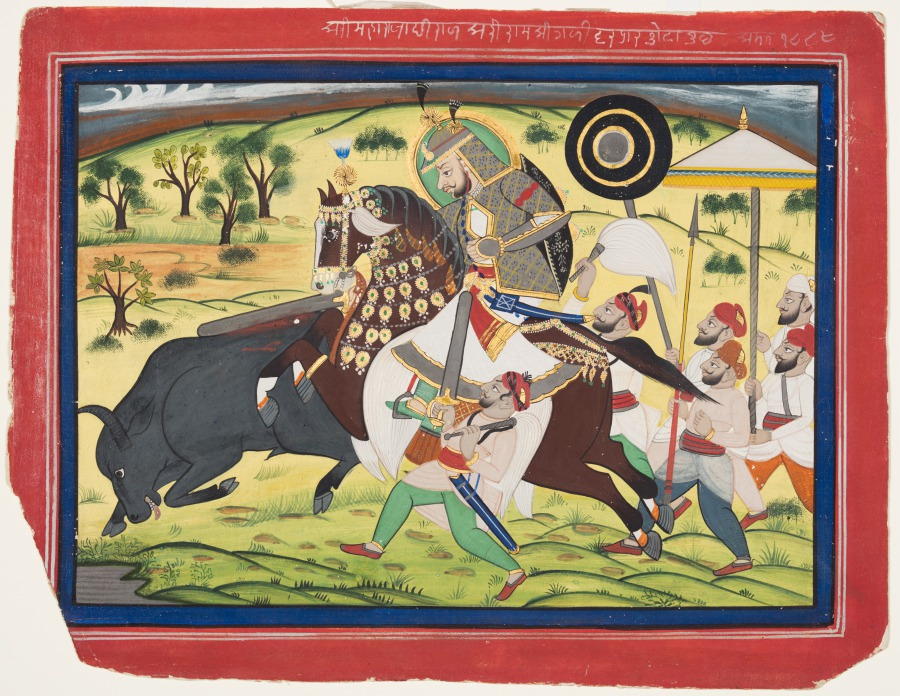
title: Maharao Ram Singh II of Kota (r. 1828–66) Hunting Buffalo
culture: Northwestern India, Rajasthan, Rajput Kingdom of Kota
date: 1832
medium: gum tempera, gold and silver on paper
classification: Painting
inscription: srī mahārājādhīrāja sarī rāma sīga jī darabāra kotā ko samata 1889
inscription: catero pīlancīthī (pīka ne līkhī) chabī darabāra sarī rāma sīga jī rī cha samata 1889 posa badi 5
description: In an energized hunting scene, the equestrian Maharaja Ram Singh smites a running buffalo with his sword. The Maharaja is supported by a hunting party, who carry various objects for the Rajput king’s vanity, including additional swords, a fly whisk, a parasol, and a canopy.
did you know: The Raja is heavily armoured for a buffalo hunt, perhaps symbolic of his financial prosperity.